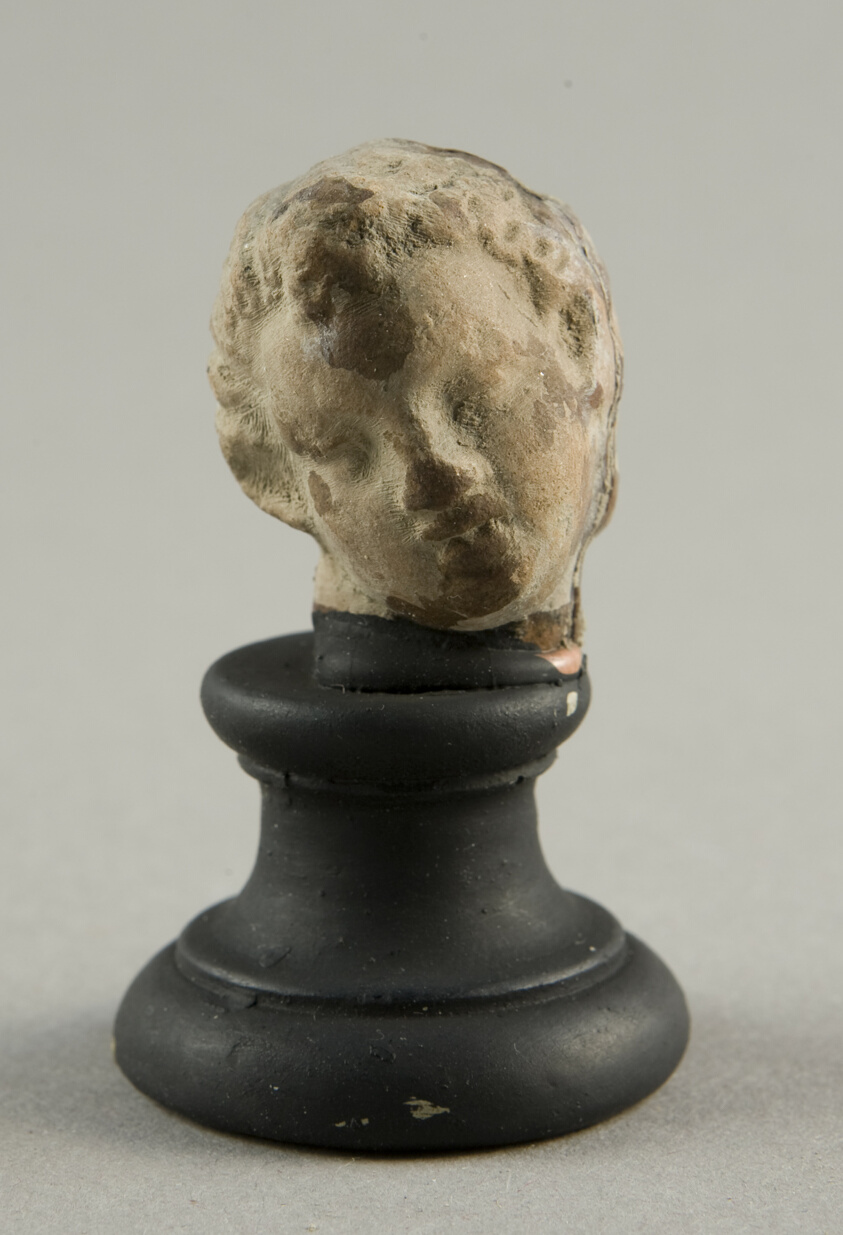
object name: Sculpture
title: Head of a Child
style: greek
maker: Greek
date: 3rd-1st century BCE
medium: terracotta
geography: Greece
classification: earthenware; ceramics; sculpture; ancient art